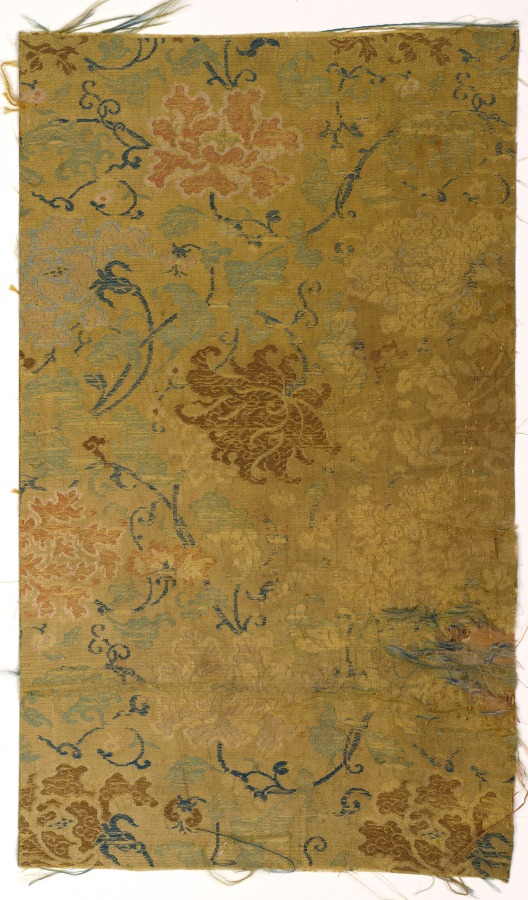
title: Fragment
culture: China, 18th century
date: 1700s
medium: twill ground; silk diasper weave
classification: Textile